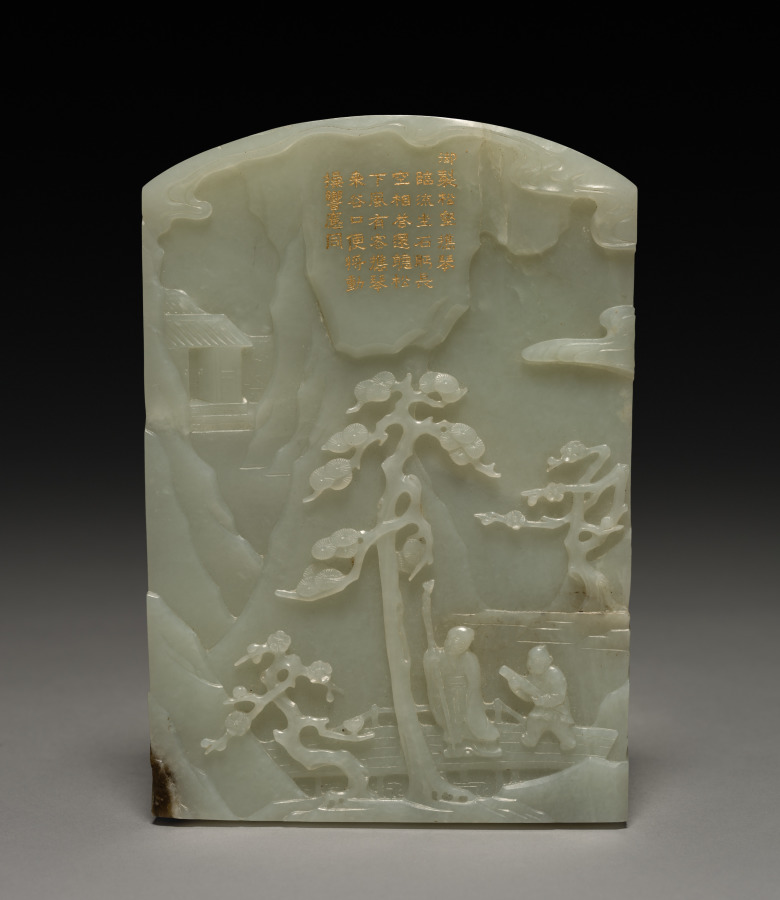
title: Table Screen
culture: China, Qing dynasty (1644–1911), Qianlong reign (1736–95)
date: 1736–95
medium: jade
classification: Jade